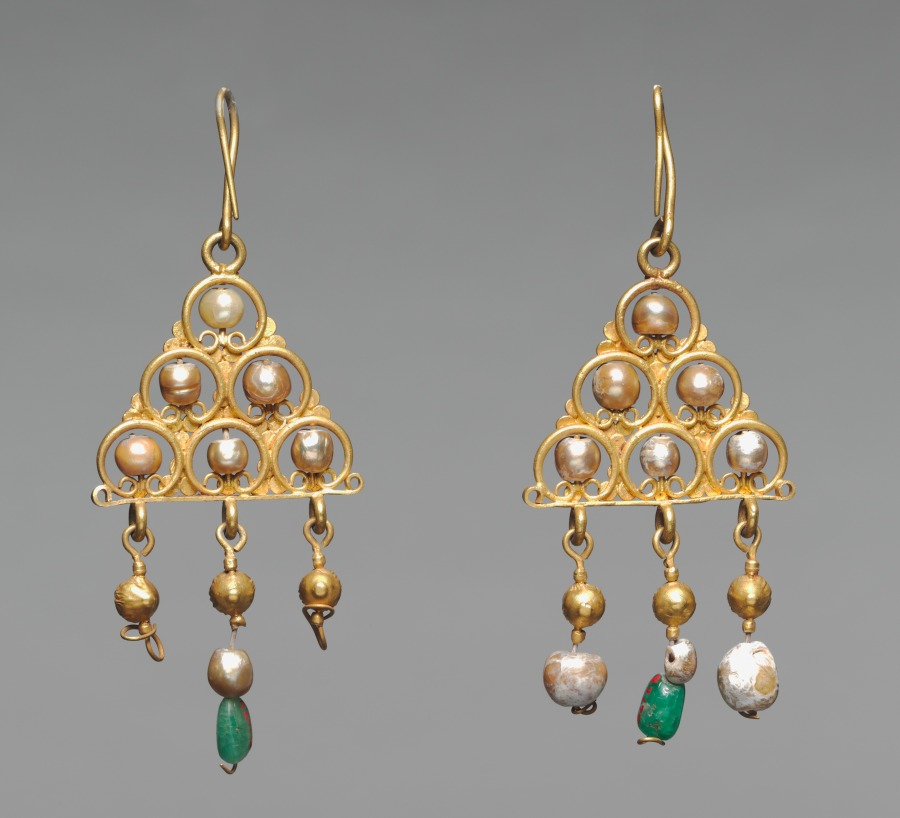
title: Earrings (pair)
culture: Byzantium, early Byzantine period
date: 600s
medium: gold, pearls, glass, and emeralds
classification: Jewelry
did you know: This piece of jewelry was worn by a woman in the fashionable courts of Byzantium. Decorated with pearls, glass, and emeralds, these gold earrings are delicate, yet eye-catching. Do you think these chandelier-style earrings would be fashionable today?